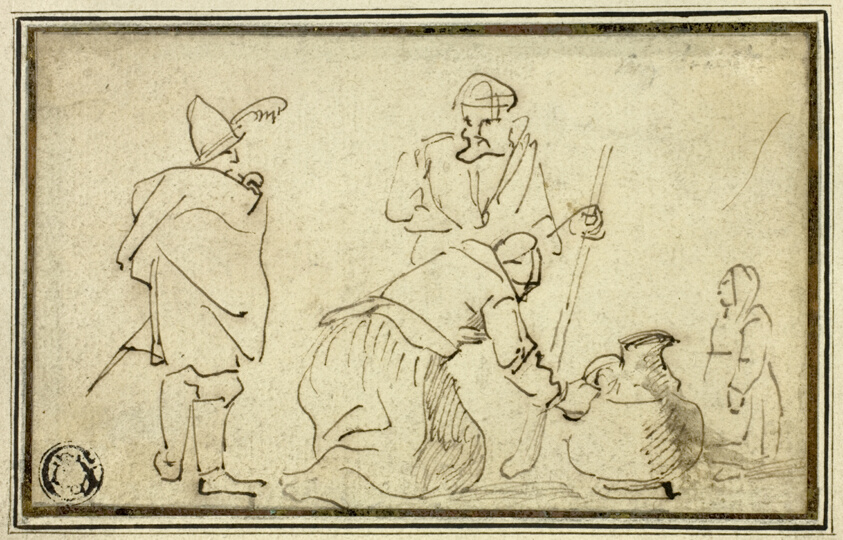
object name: Drawing and Watercolor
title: Two Soldiers, Woman with Jug and Child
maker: Adriaen Brouwer or possibly after; Flemish, 1605/06-1638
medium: Pen and brown ink, with brush and brown wash, on ivory laid paper, laid down on ivory wove paper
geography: Flanders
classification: pen and ink drawings; drawings (visual works); prints and drawing